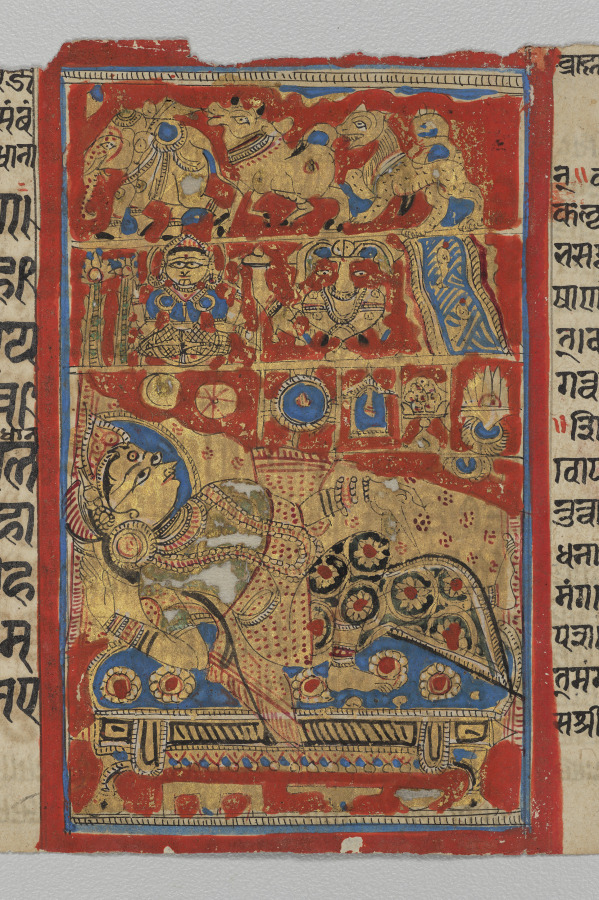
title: The Fourteen Dreams of the Brahman Woman Devananda, Folio 3 (recto), from a Kalpa-sutra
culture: Western India, Gujarat, last quarter of the 15th century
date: c. 1475–1500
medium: Gum tempera, ink, and gold on paper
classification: Painting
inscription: [[upper right]] brāhmaṇā 14 svapna